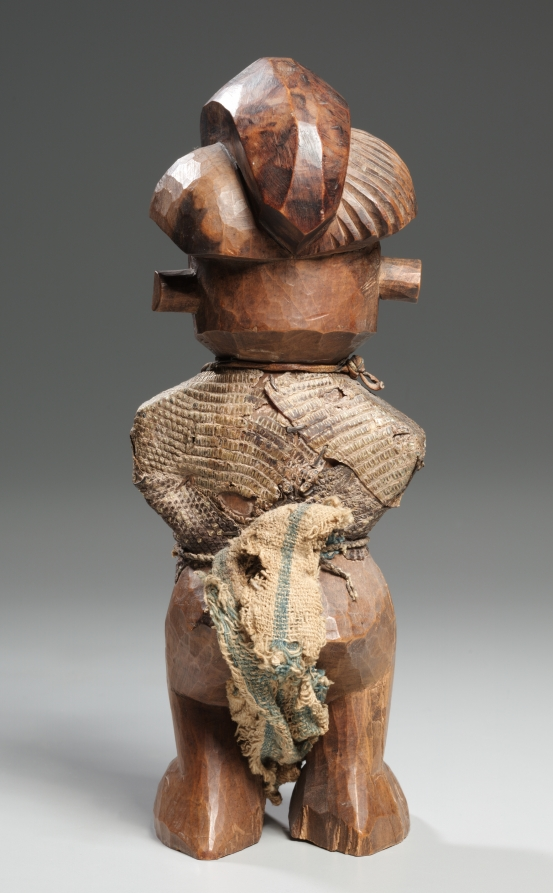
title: Figure (kiteki)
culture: Africa, Central Africa, Democratic Republic of Congo, Yaka-style carver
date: late 1800s–mid-1900s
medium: Wood, lizard skin, leopard tooth, pods, cloth, and natural fiber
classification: Sculpture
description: Biteki is the generic name for Yaka figures used as containers for magical ingredients. After being charged by a ritual specialist, they become minkisi, or power objects, and gain the power to either cure or harm. This example, with various leadership accouterments, likely belongs to the category called phuungu. Placed inside a house, the statuette would have protected against witches and other evil.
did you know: The sculptures and the specially selected materials inside assist the prayers of owners for protection from harm, sickness, or loss.